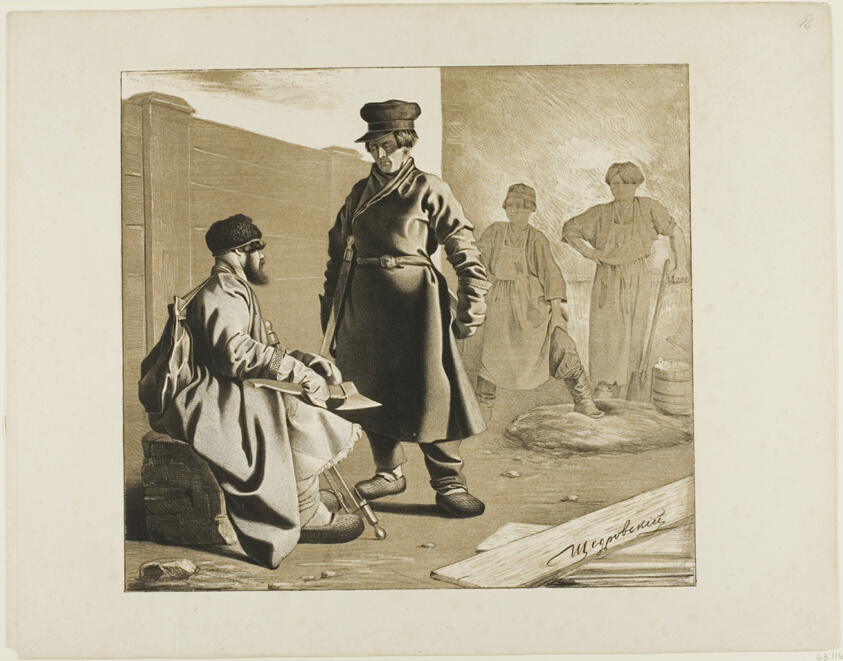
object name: Print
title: Scenes from Russian Folk Life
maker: Ignatii Stepanovich Shchedrovskii (Russian, 1815-1870)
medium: Color lithograph on paper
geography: Russia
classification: lithograph; print; prints and drawing